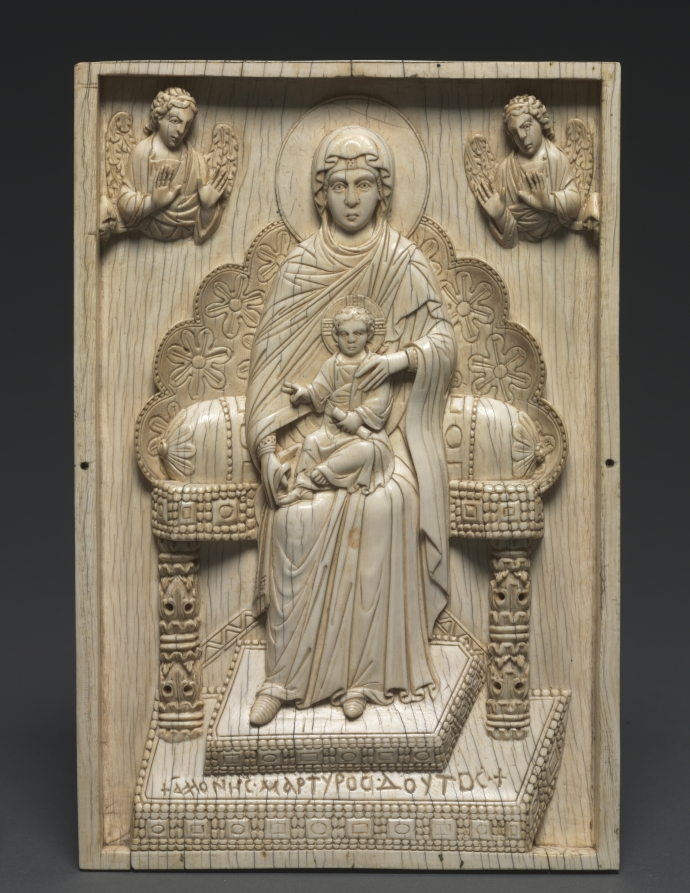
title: Ivory Plaque with Enthroned Mother of God ("The Stroganoff Ivory")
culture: Byzantium, Constantinople, Byzantine period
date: 950–1025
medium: ivory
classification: Ivory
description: The Mother of God is seated on a lavishly carved, high-backed throne. Two angels hover above, drawing attention to the Christ child poised in her lap. Representations of the enthroned Virgin and Child have a long tradition in Byzantine art, stretching back as far as the 6th century. With one hand raised in blessing, the other holding a scroll, Christ is portrayed here as an emotionless and supernatural child, visualizing for the pious beholder the mystery of his incarnation.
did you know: This ivory is also known as the Stroganoff Ivory because it was once in the collection of Sergei Grigoryevich Stroganoff, a Russian statesman and art historian.